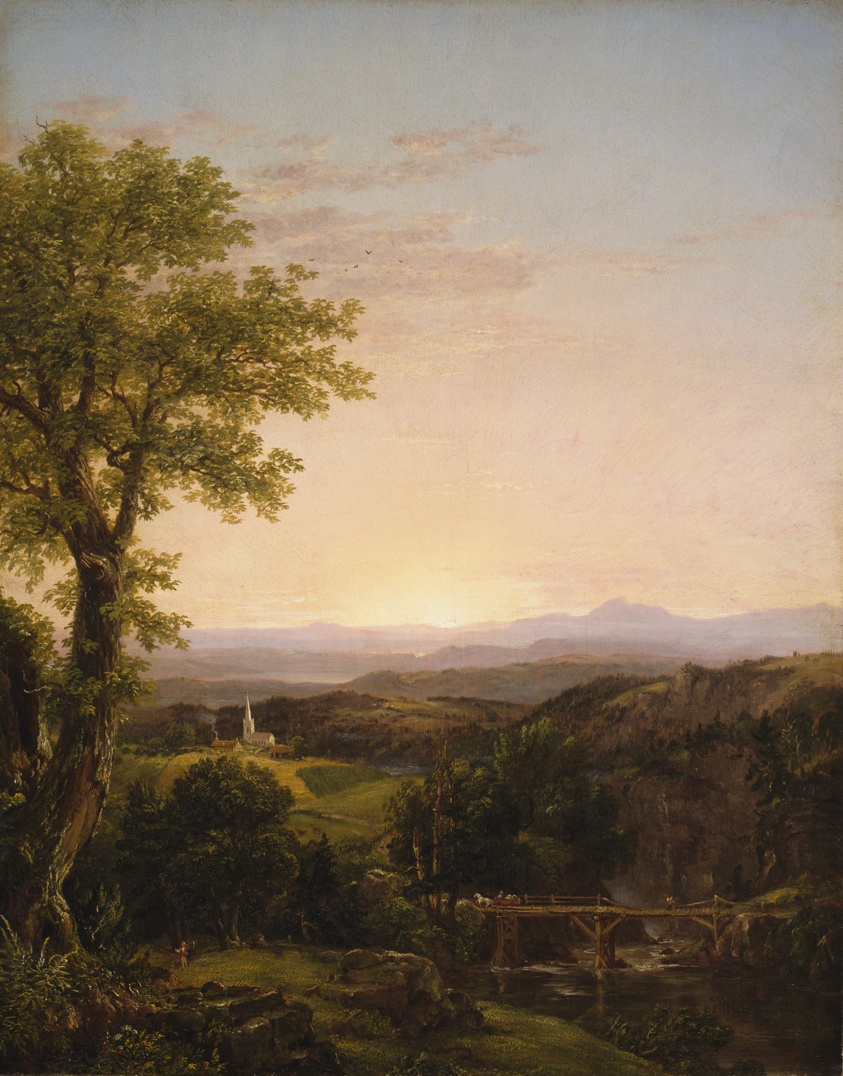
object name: Painting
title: New England Scenery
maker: Thomas Cole (American, born England, 1801–1848)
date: 1839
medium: Oil on canvas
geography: New England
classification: painting; american arts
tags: landscapes